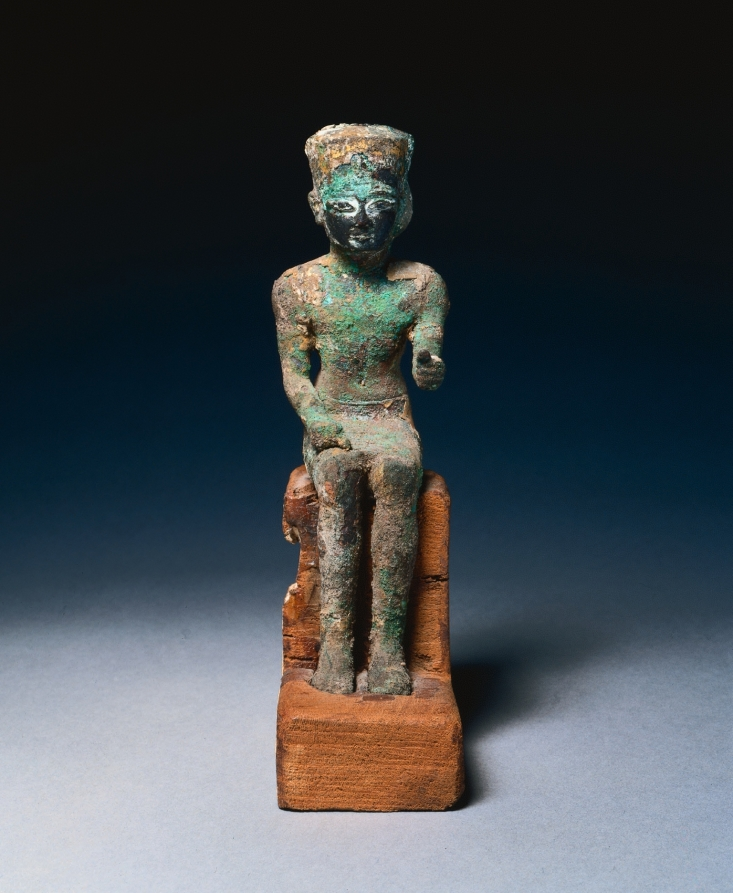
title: Statuette: Seated Amen-Ra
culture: Egypt, Late period (715–332 BCE), Dynasties 25–26(?)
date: 715–525 BCE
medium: bronze and black copper, gilded and inlaid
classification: Sculpture